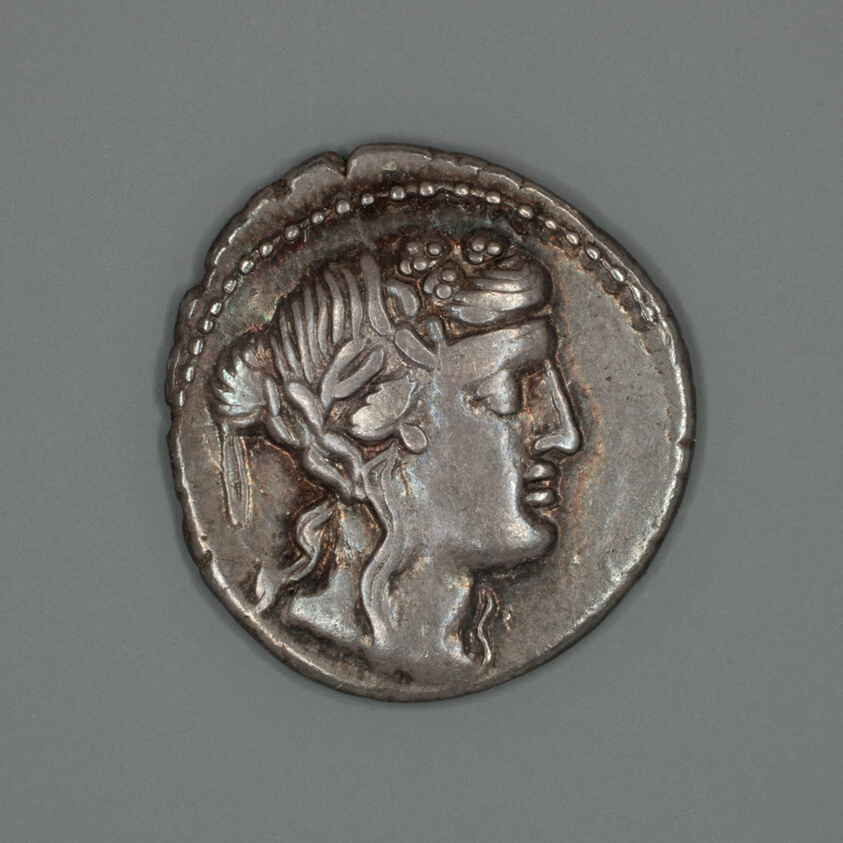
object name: Coin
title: Denarius (Coin) Depicting the God Liber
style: roman (ancient, style or period), ancient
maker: Roman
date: about 78 BCE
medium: Silver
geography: Roman Empire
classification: coin; ancient art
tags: Chariots